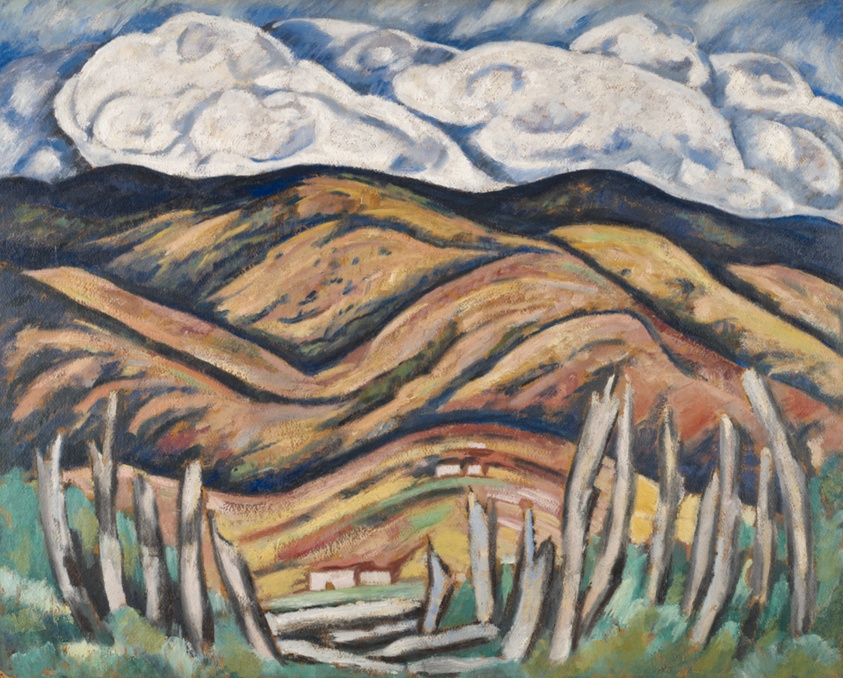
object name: Painting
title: The Last of New England—The Beginning of New Mexico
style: Modernism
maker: Marsden Hartley (American, 1877–1943)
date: 1918–19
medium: Oil on paperboard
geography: United States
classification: oil on panel; painting; modern and contemporary art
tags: landscapes